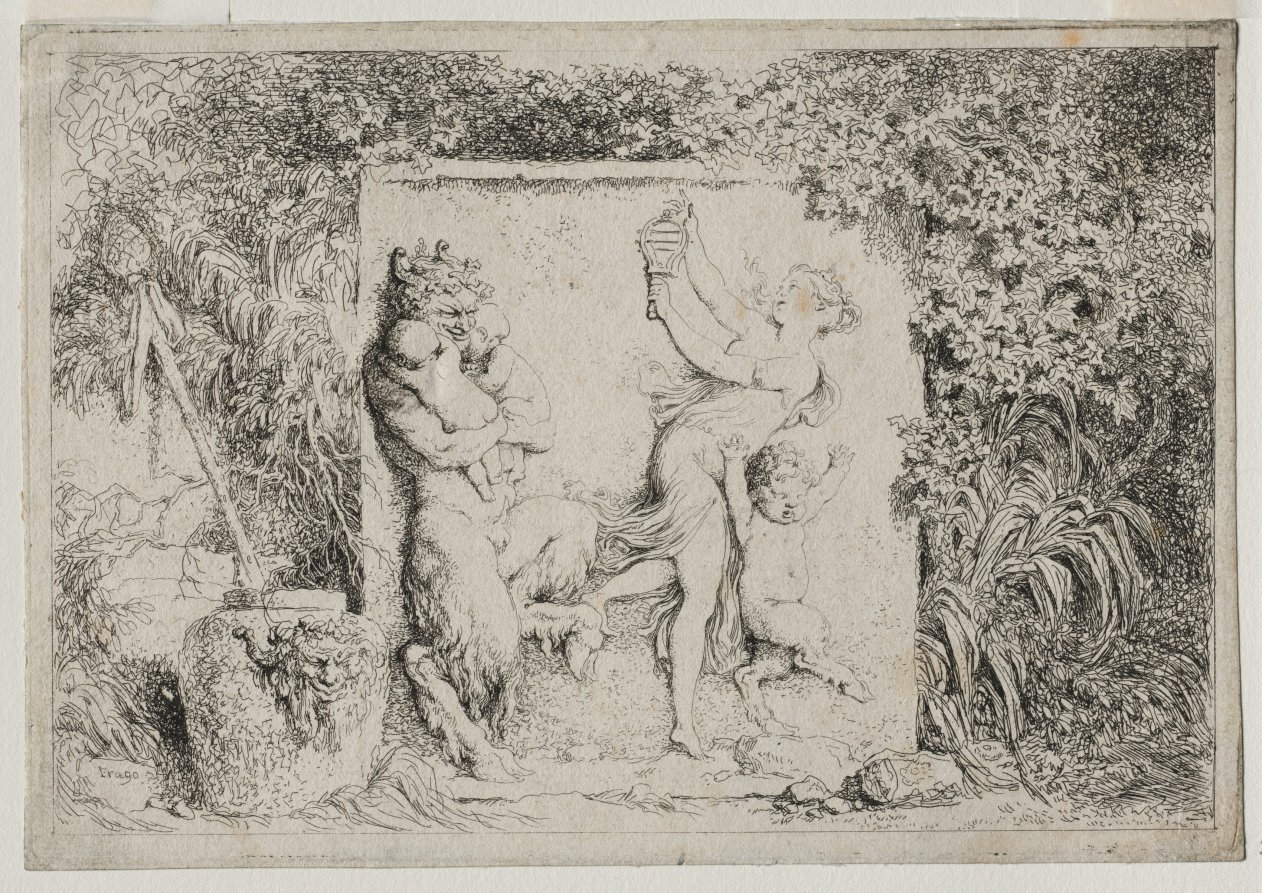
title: Bacchanales: The Satyr's Dance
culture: France, 18th century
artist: Jean-Honoré Fragonard (French, 1732–1806)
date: 1763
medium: etching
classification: Print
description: Jean-Honoré Fragonard made these four etchings shortly after returning to Paris from Italy, where he studied antique subjects and sculpture. He may have also looked at other sources for inspiration, such as Jacques François Joseph Saly’s suite of vase designs. Though the prints feature the followers of Bacchus, the wine god does not make an appearance. Instead, Fragonard highlighted the playfully erotic frolics, conflicts, and even family life of a group of bacchants, conceiving them as low-relief sculptures on stone fragments within abundant foliage. Fragonard’s creations helped to popularize revelries in nature in French art, architecture, and garden design during the later 1700s.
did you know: On the left side of the composition, standing inside a large vessel like an umbrella in a vestibule, is a pinecone-topped staff called a thyrsus. Thyrsi were carried by Bacchus and his followers.